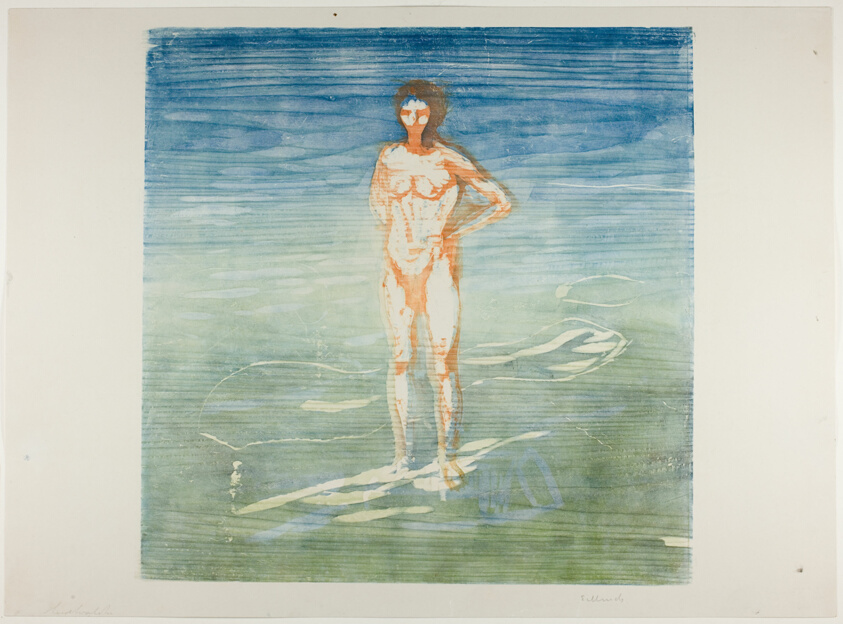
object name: Print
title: Man Bathing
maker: Edvard Munch (Norwegian, 1863-1944)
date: 1899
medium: Color woodcut from two blocks on grayish ivory card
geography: Norway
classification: woodcut; print; prints and drawing